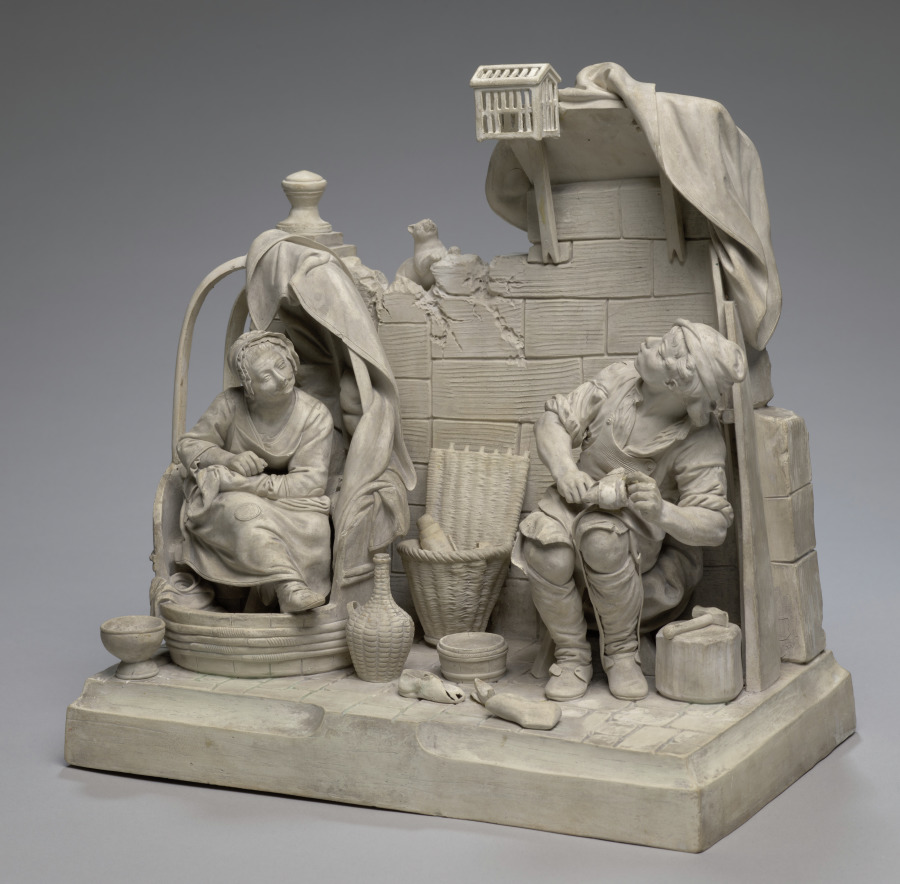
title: The Cobbler and His Bird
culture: France, Bellevue near Toul, late 18th century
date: late 1700s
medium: earthenware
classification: Ceramic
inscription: incised inscription on back of base: "Bellevue van de Toul."